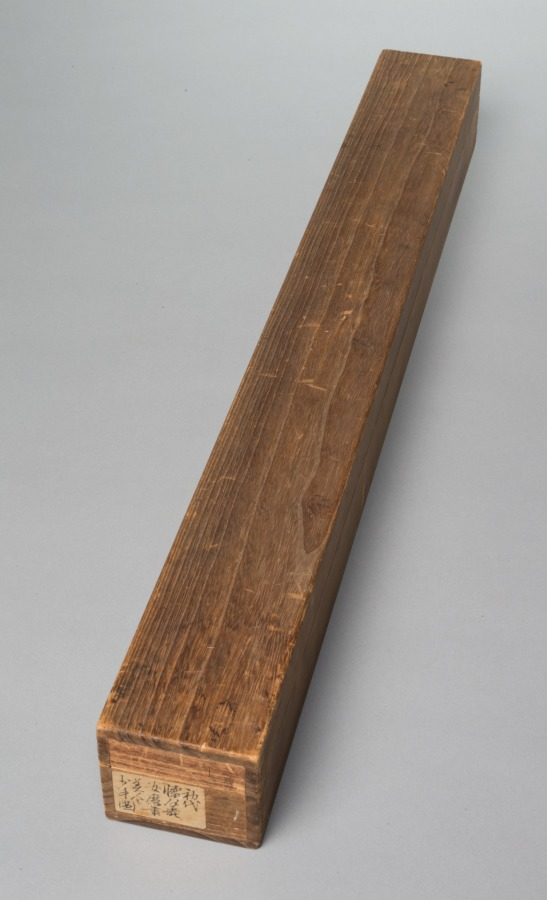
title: Departure from Kashima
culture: Japan, Nanbokuchō period (1336–92)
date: 1336–92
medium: hanging scroll; ink and color on silk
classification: Painting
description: The kami Takemikazuchi from Kashima (in present-day Ibaraki Prefecture) departs on a white deer for Mount Mikasa in Nara, where he takes up residence. The five Kasuga kami are presented within a golden circle supported by the branches of a sakaki tree, from which trail five white paper streamers—indicating the purity and sacredness of the five shrine halls of the complex—as well as blossoming wisteria vines, a symbol of the Fujiwara family. The two figures walking along near the stag’s back legs are Nakatomi no Tokifū and his younger brother Hidetsura, who have followed Takemikazuchi and become priests of Kasuga Taisha.